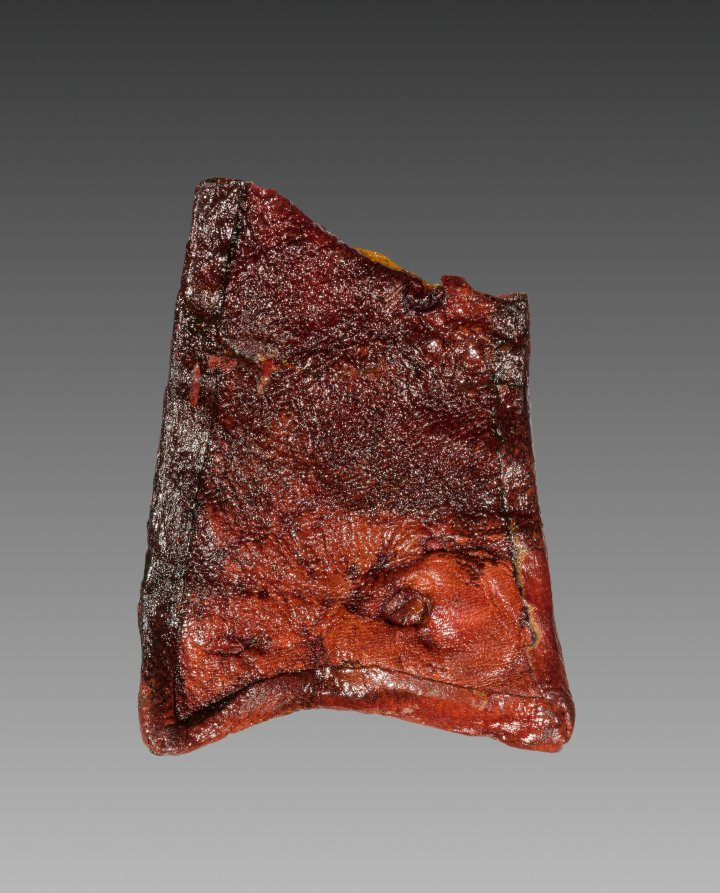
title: Tab from Mummy Band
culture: Egypt, Third Intermediate (1069–715 BCE), Dynasty 22, reign of Osorkon I (992–887 BCE)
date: 945–715 BCE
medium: stained leather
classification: Funerary Equipment